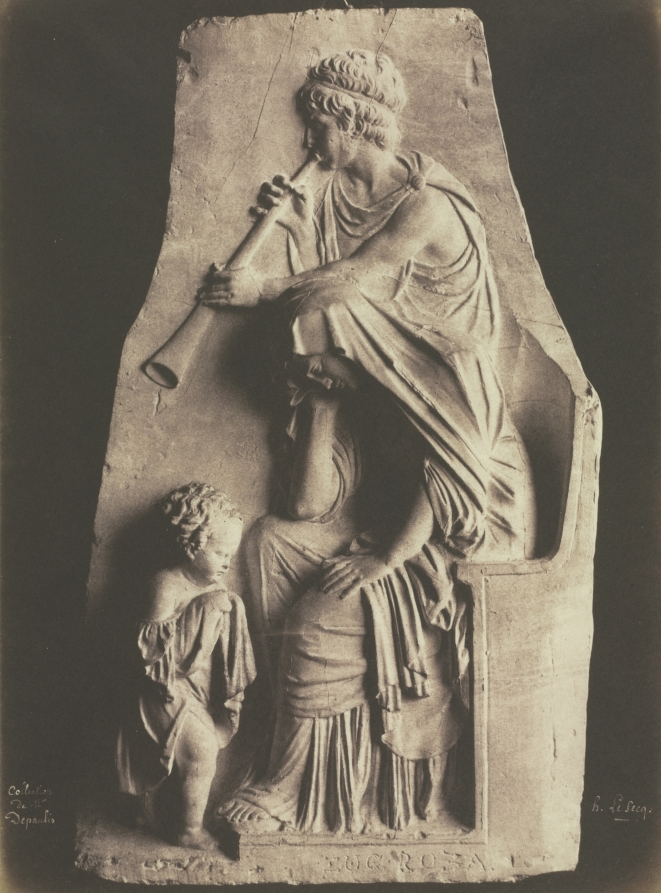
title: Plaster Cast from the Depaulis Collection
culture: France, 19th century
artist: Henri Le Secq (French, 1818–1882)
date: c. 1854–55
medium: salted paper print from waxed paper negative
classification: Photograph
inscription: written in negative on recto: "Collection/ de Mr/ Depaulis." "h. Le Secq." (underlined)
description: Henri Le Secq was one of the most gifted early photographers to record architecture and sculpture. This stunning image is from a small, rare group of photographs of the collection of Alexis-Joseph Depaulis (1792–1867), a French engraver and collector of historic paintings, drawings, prints, and sculptures, as well as casts of ancient and modern objects. The depicted work is a plaster cast made from an early 19th-century neoclassical funerary sculpture created by an uniden-tified artist, probably French. Le Secq's exceptional talent for capturing the broad effects of light and shadow animates the figures in this complex sculpture, giving them physical presence. Indeed, the shadows are deep and diffused because of the texture of the paper negative and the lengthy exposure time.